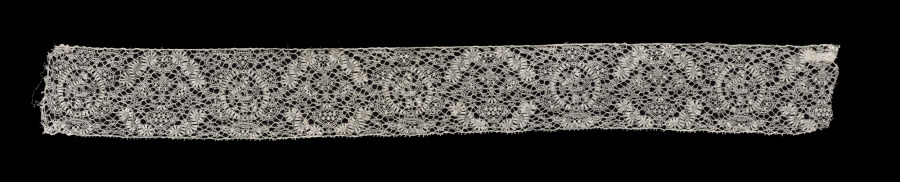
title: Lace Edging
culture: Belgium, Binche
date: 1700s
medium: Linen: bobbin lace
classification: Lace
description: The design of this piece of lace is similar to three other pieces of lace in CMA's collection--1945.86, 1945.88, and 1945.89.